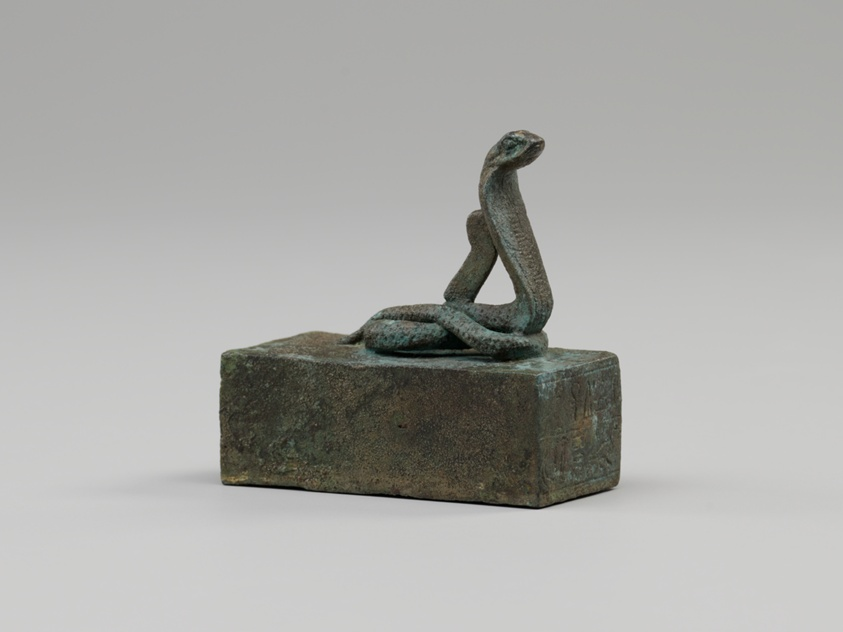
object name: Sculpture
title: Box for a Mummified Animal with Cobra Figure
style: late period (egyptian), egyptian, ancient, ptolemaic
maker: Egyptian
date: Late Period–Ptolemaic Period (664–30 BCE)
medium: Copper alloy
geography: Egypt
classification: coffin; bronze; metal; sculpture; ancient art; reliquary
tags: snakes, gods (deities), Hieroglyphs, serpents